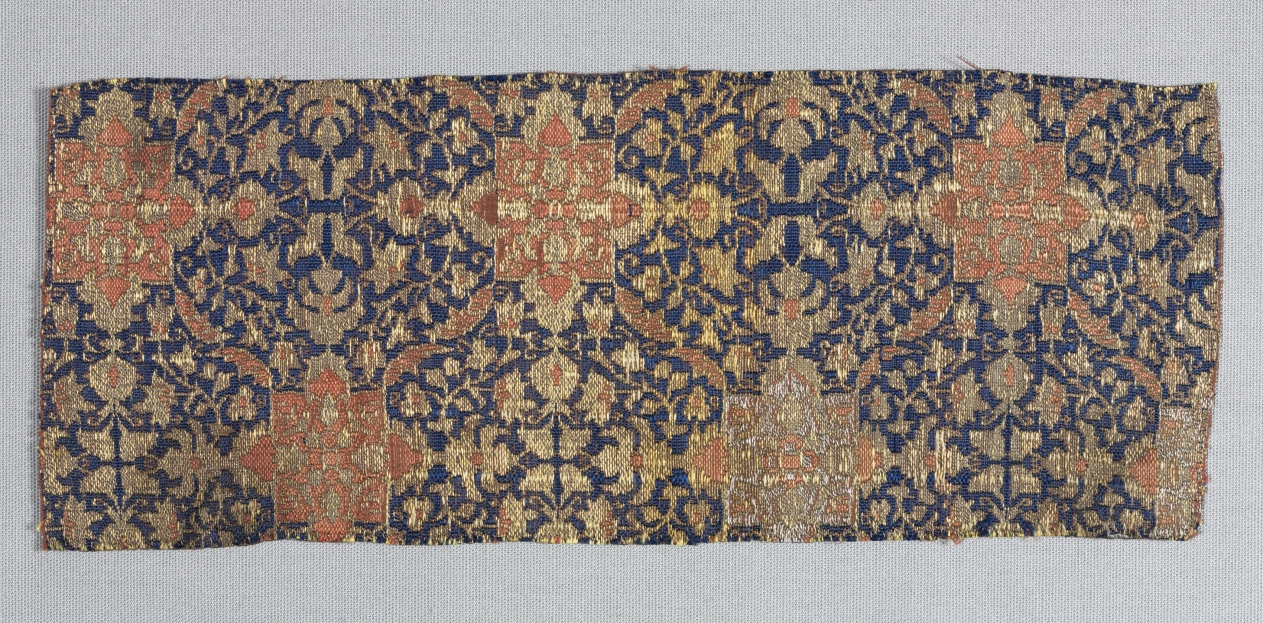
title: Fragment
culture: Iran, 17th century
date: 1600s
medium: compound tabby weave; silk and metallic thread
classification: Textile